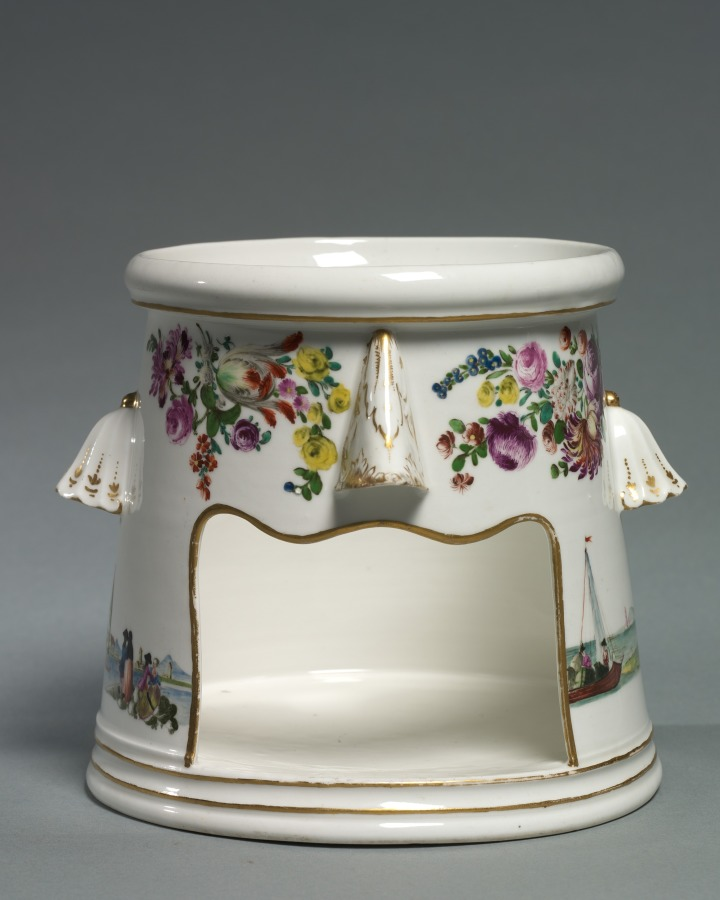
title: Food Warmer (Veilleuse)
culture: Germany, Nymphenburg, 18th century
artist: Nymphenburg Porcelain Factory (German, founded 1747)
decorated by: probably by Georg Christoph Lindemann (German)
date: c. 1758–1760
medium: porcelain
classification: Ceramic